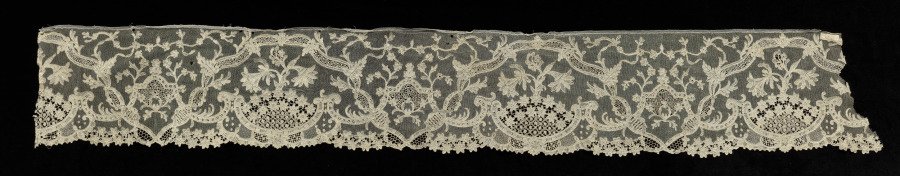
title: Lace Flounce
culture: Italy, Burano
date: 1900–1943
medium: Linen: needle lace (Burano Point)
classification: Lace